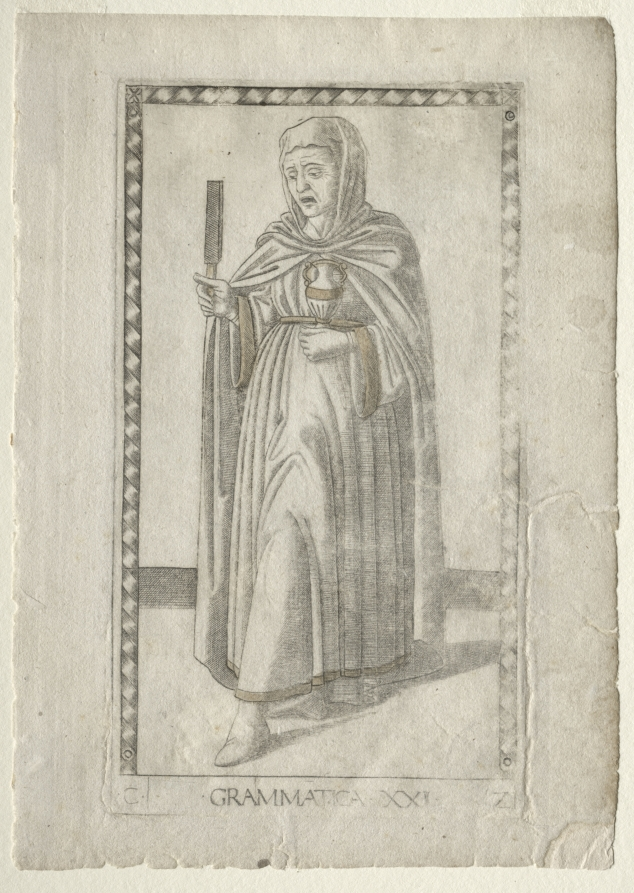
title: Grammar (from the Tarocchi, series C: Liberal Arts, #21)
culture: Italy, Ferrara, 15th century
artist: Master of the E-Series Tarocchi (Italian, active 1460s)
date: before 1467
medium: engraving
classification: Print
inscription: Lettered below the image of Grammatica (Grammar): ·C· / ·GRAMATICA·XXI· / 21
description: This engraving is part of the group “C” named Liberal Arts. Conceptually, the liberal arts descended from classical antiquity, and were divided into the Trivium (Grammar, Rhetoric, and Dialectic or Logic) and the Quadrivium (Music, Geometry, Arithmetic, and Astronomy). In the Tarocchi set the total number was risen to ten, with the addition of the three disciplines (Poetry, Philosophy, and Theology). The liberal arts denoted knowledge or skills considered necessary to participate in a free society. By the late Middle Ages, they began to be represented in the visual arts as womanlike allegories. Here, Grammatica (Grammar) is personified as a full-length female figure turned to left. Her left hand carries a vessel containing medicine to correct children’s pronunciation, while her right hand holds up a file, meant to remove grammatical mistakes from their tongues. Regarded as the foundation of the Liberal Arts, Grammar teaches how to speak with grace and perfection.